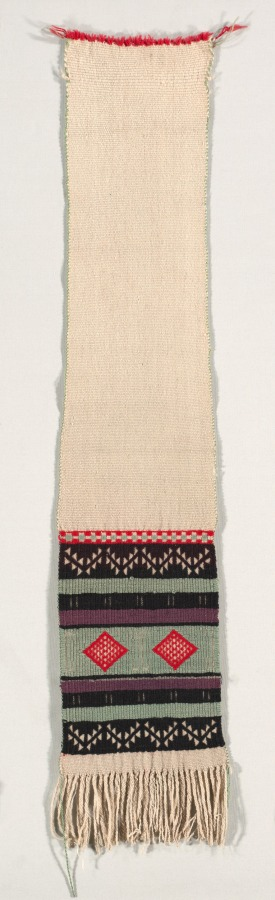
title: "Hopi Brocade" Style Dance Sash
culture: America, Native North American, Southwest, Pueblo (Hopi), Post-Contact, Transitional Period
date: c. 1880–1900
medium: plain weave with supplementary weft wrap; wool (homespun and Germantown)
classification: Textile